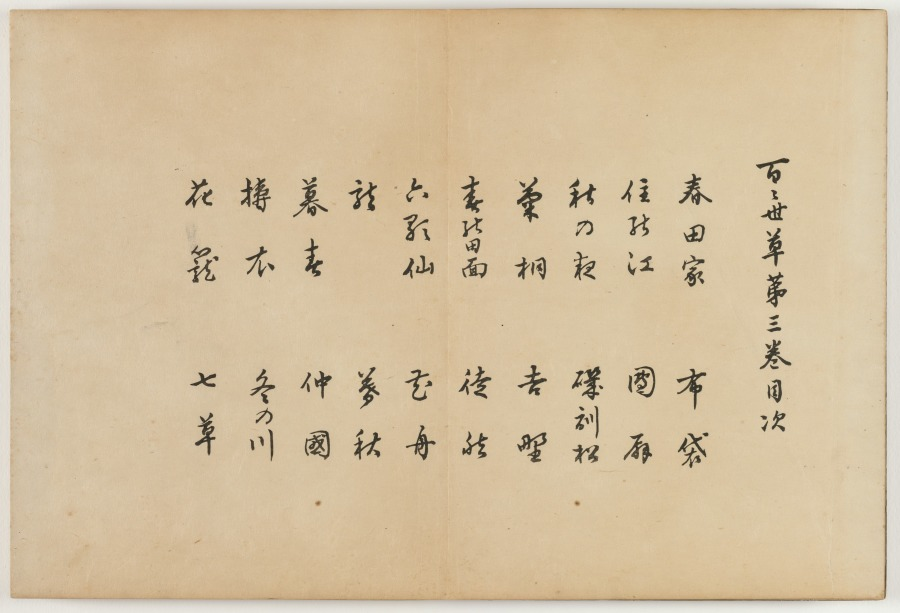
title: Flowers of a Hundred Worlds (Momoyogusa), Vol. 3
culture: Japan, Meiji period (1868–1912)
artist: Kamisaka Sekka (Japanese, 1866–1942)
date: 1909–10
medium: one of a set of three woodblock printed folding-books; ink, color, gold, and silver on paper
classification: Bound Volume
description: This volume from a set of three woodblock printed albums displays the graphic design prowess of Kamisaka Sekka. The images were first distributed one by one to subscribers to the series but later were reissued in bound form, like this book, for mass consumers. Each print features a vignette taken from nature or Japanese literature. Many of the scenes have a long history in Japan, originating in the 900s or 1000s and having been interpreted by all manner of artists since that time. Sekka’s selections hew closely to precedents from the Rinpa style originated by painter Tawaraya Sōtatsu (c. 1570–c. 1640) and calligrapher Hon’ami Kōetsu (1558–1637).